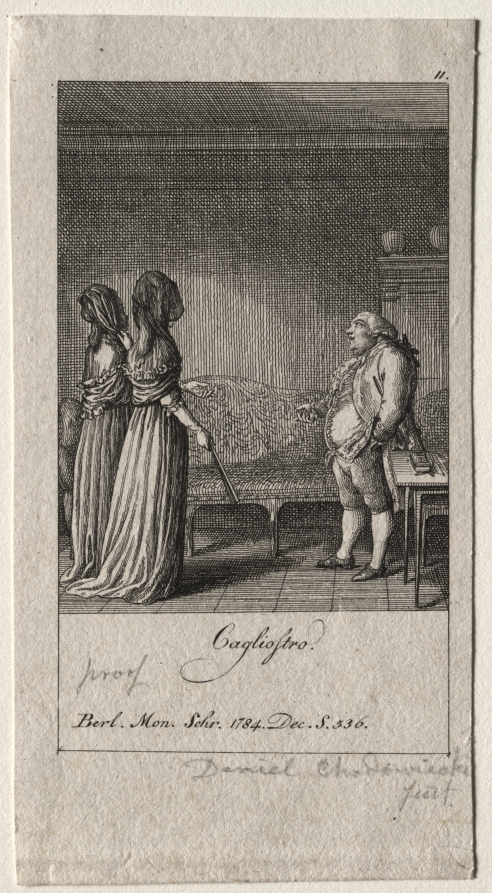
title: Cagliostro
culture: Germany, 18th century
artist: Daniel Chodowiecki (German, 1726–1801)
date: 1784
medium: etching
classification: Print